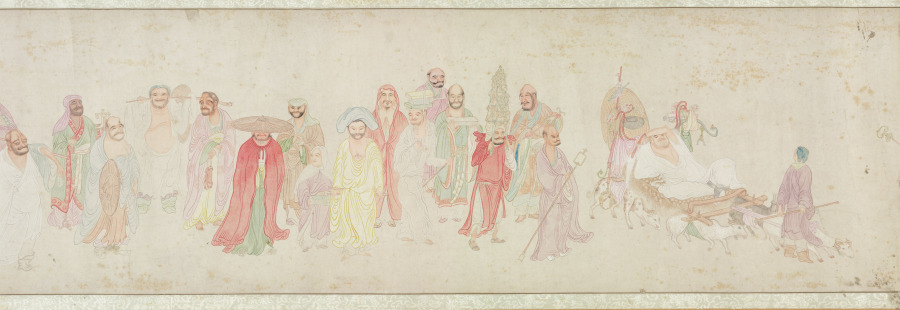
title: The Five Hundred Arhats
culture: China, Ming dynasty (1368–1644)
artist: Wu Bin (Chinese, active c. 1591–1626)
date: 1591–1626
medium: Handscroll; ink and color on paper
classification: Painting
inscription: 枝隱頭陀吳彬齋心拜寫 [印]吳彬之印; 文中父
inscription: 7 seals of Qianlong emperor (r. 1736–95): Gu xi tian zi 古希天子; Shou 壽; Qianlong jian shang 乾隆鑑賞; San xi tang jing jian xi 三希堂精鑑璽; Yi zi sun 宜子孫; Tai shang huang di zhi bao 太上皇帝之寳; Qian qing gong bao 乾清宮寶.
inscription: 6 seals of Cheng Qi 程琦 (1911–1988): Ke an geng zi wu shi yi hou suo de ming ji 可菴庚子五十以後所得名跡; 5 other Cheng Qi seals.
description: More than 66 feet long, this handscroll depicts 447 luohans, 72 attendants, and the bodhisattva of compassion at its very end. Luohans (arhats in Sanskrit), disciples of the Buddha and protectors of the Buddha’s law, possess supernatural powers and take on myriad external appearances. The amusing assortment of characters are engaged in an array of religious, secular, and miraculous activities. The painter used stylistic features borrowed from earlier artists, carefully controlled lines, and refined coloring. Wu Bin was a lay Buddhist and depicting this sort of image was part of a religious practice seeking understanding of the Buddha’s teaching.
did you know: Far advanced on the path to enlightenment, arhats have the capacity to tame tigers, free dragons, and to float on water or in the air.